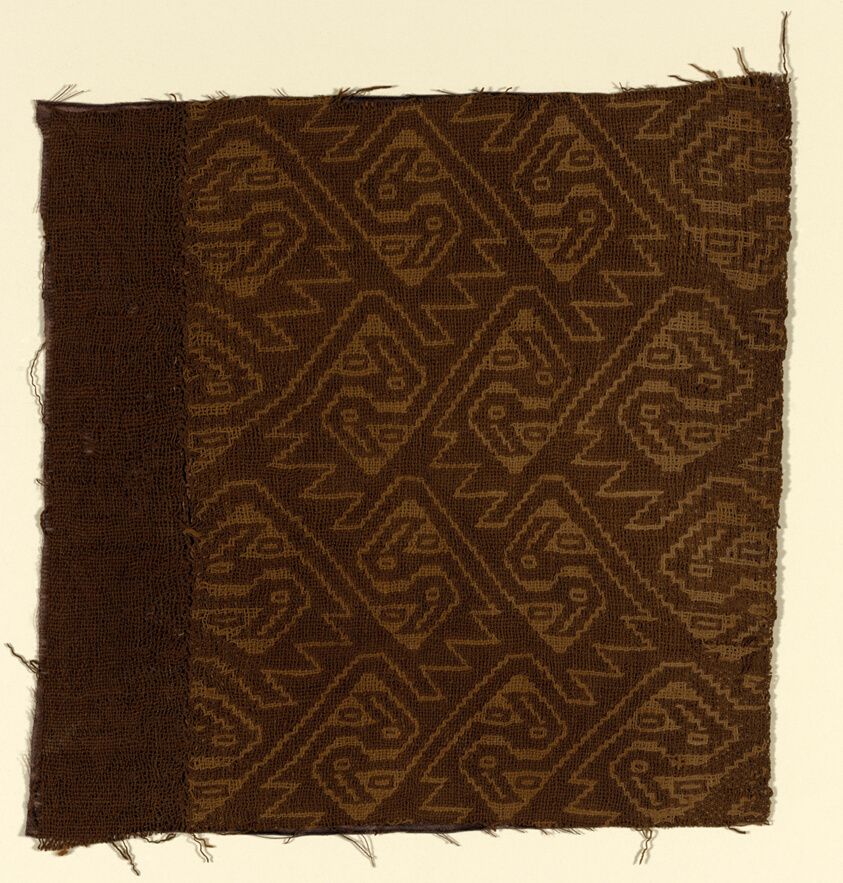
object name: Textile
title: Fragment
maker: Pativilca Valley, north-central coast, Peru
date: 1000/1476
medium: Cotton, plain weave double cloth; edged with cotton, plain weave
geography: Peru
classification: textile; weaving